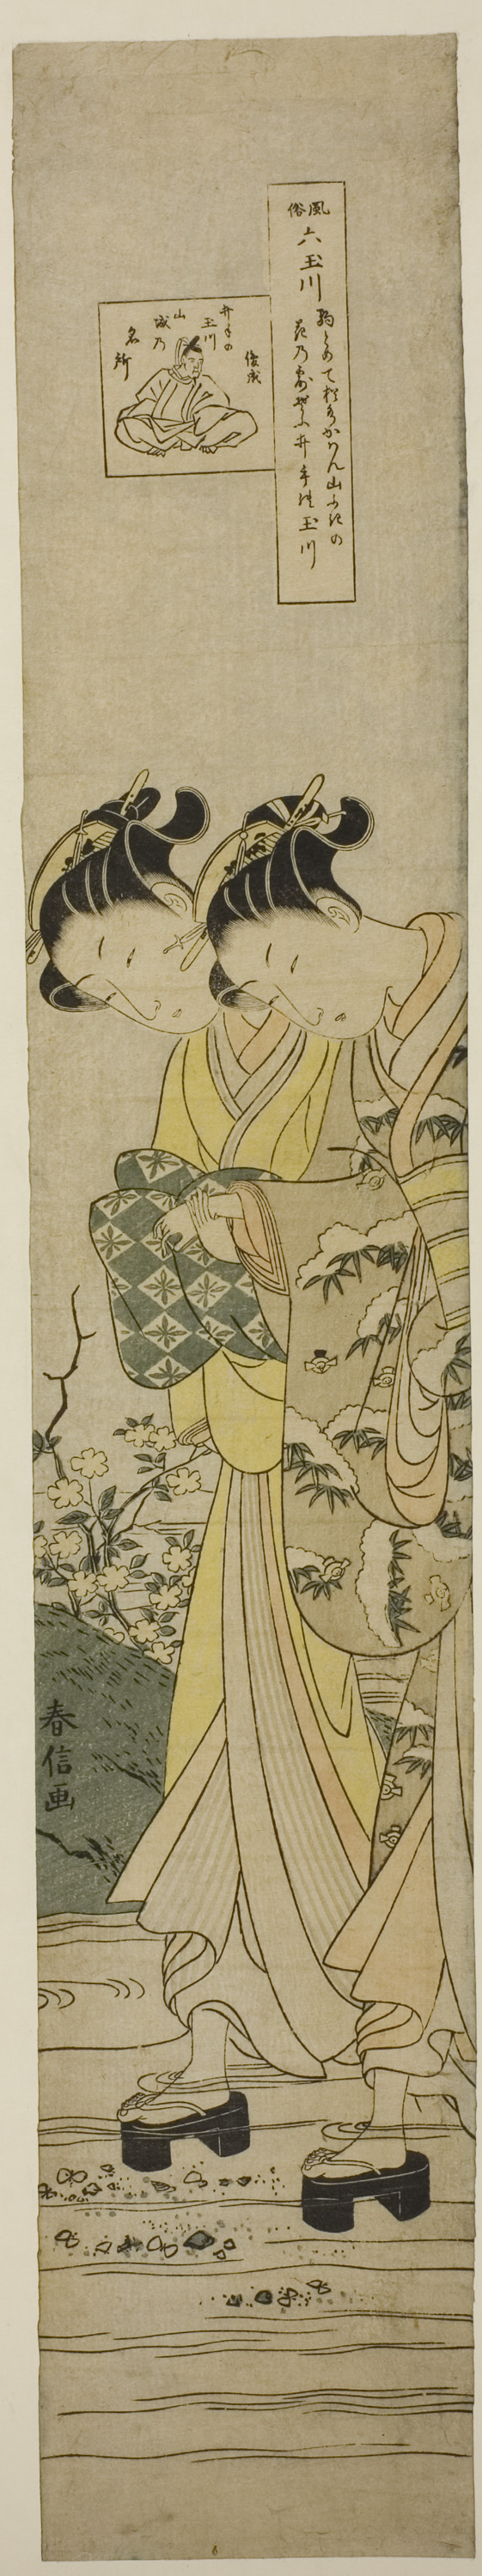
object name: Print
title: The Jewel River at Ide (Ide no Tamagawa), from the series "Six Jewel Rivers in Popular Customs (Fuzoku Mu Tamagawa)"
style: Japanese (culture or style)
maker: Suzuki Harunobu 鈴木 春信; Japanese, 1725 (?)-1770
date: c. 1769/70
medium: Color woodblock print; hashira-e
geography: Japan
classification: woodblock print; print; asian art